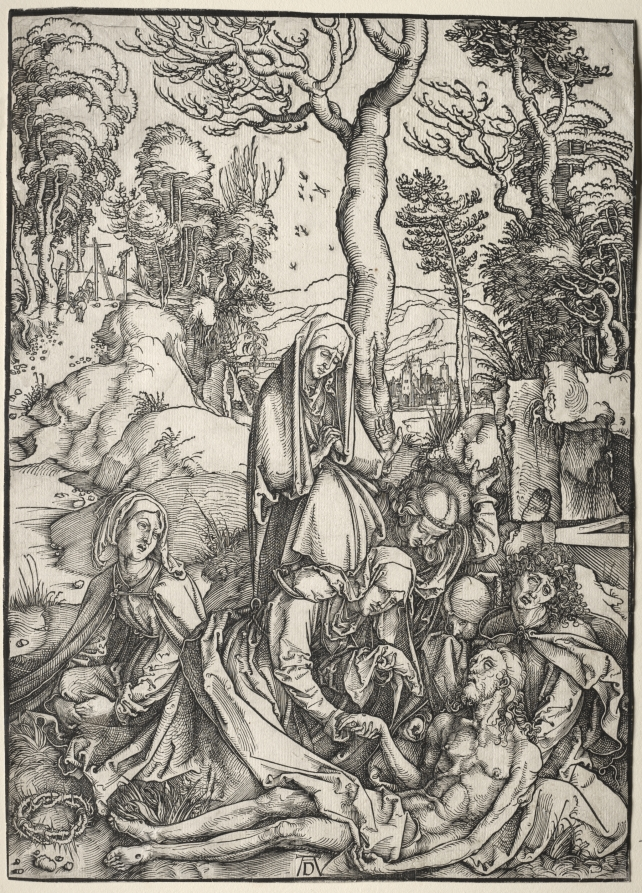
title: The Great Passion: The Lamentation of Christ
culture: Germany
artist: Albrecht Dürer (German, 1471–1528)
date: c. 1497–1510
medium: woodcut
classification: Print